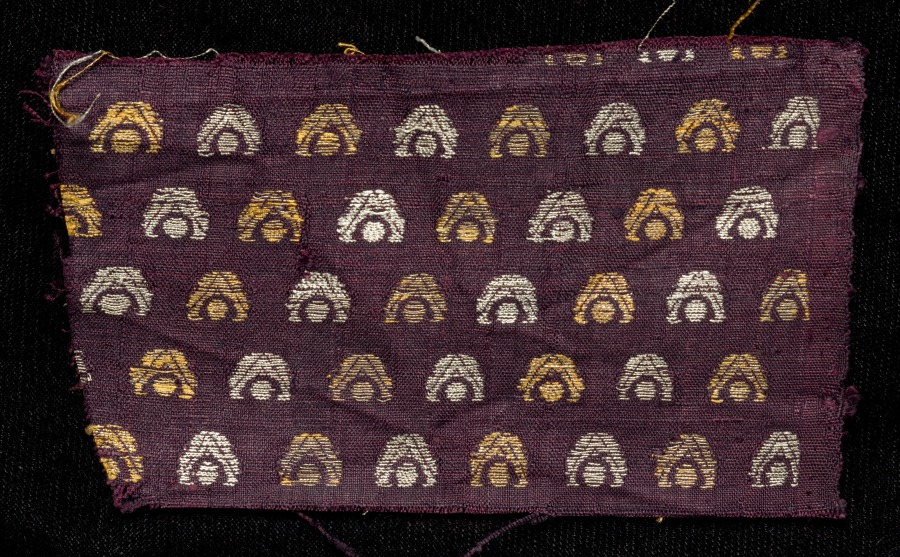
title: Fragment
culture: India, 19th century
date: 1800s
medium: brocade; silk, gold and silver threads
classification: Textile